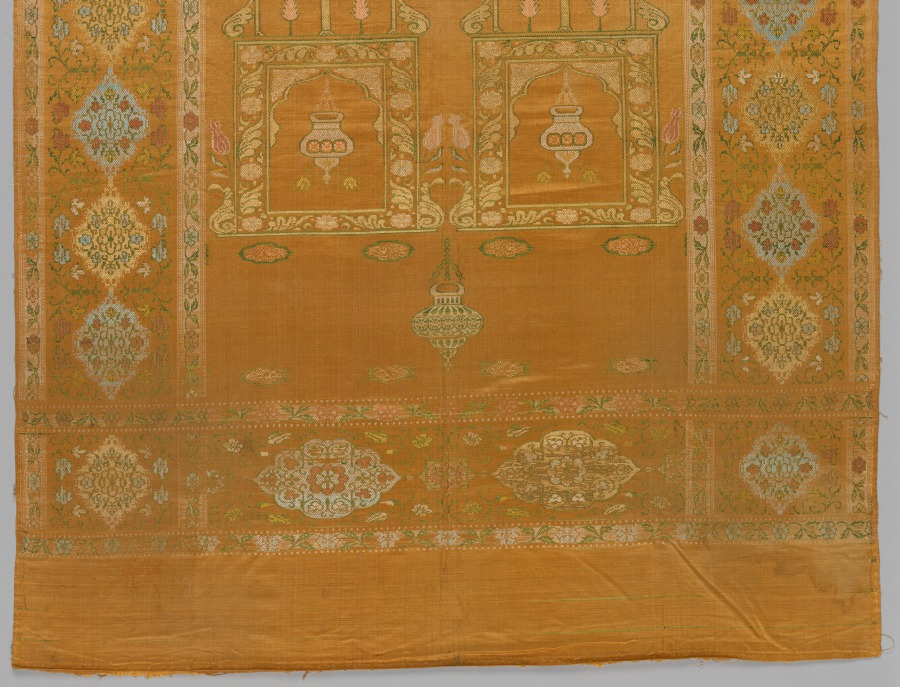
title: Coverlet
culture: Turkey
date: 1800s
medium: silk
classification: Textile